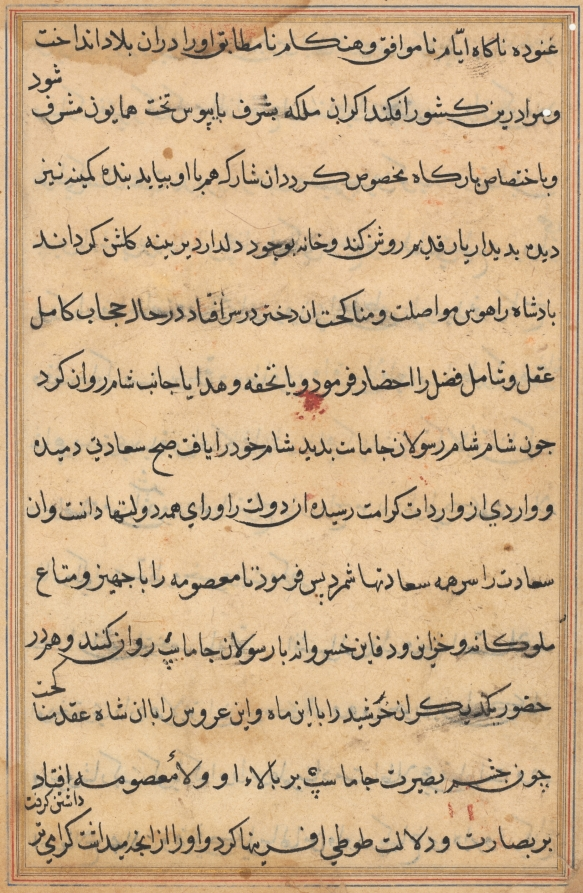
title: Page from Tales of a Parrot (Tuti-nama): text page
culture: Mughal India, court of Akbar (reigned 1556–1605)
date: c. 1560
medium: gum tempera, ink, and gold on paper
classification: Painting